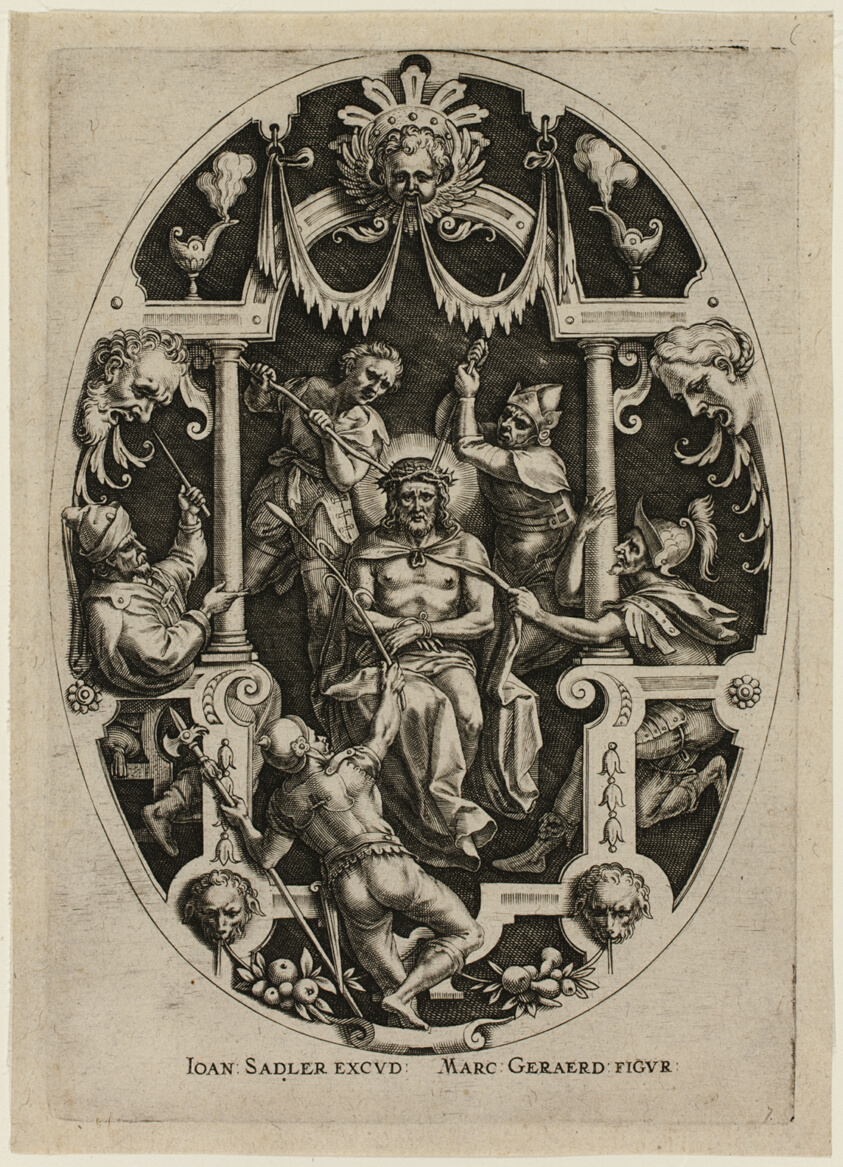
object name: Print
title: Crowning with Thorns, from Passion of Christ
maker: Jan Sadeler, the Elder (Flemish, 1550-1600); after Marcus Gheeraerts, the Elder (Flemish, c. 1520-c. 1590)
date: 1575/1600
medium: Engraving in black on cream laid paper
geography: Flanders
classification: engraving; print; prints and drawing